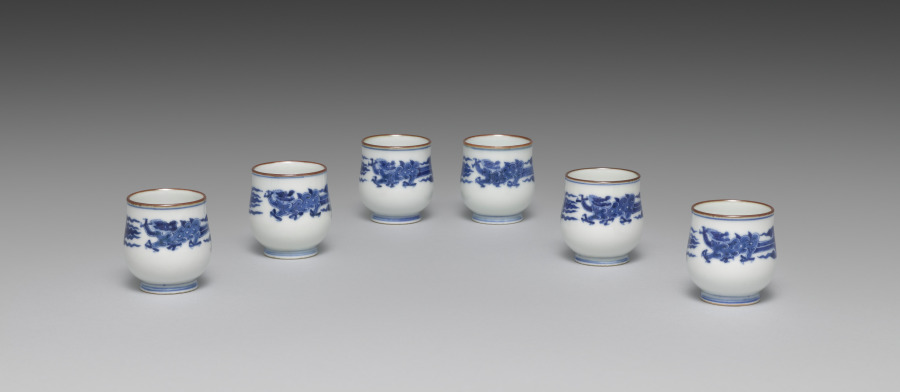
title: Sake Cups with Dragons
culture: Japan, Meiji period (1868–1912)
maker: Seifū Yohei III (Japanese, 1851–1914)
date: 1893–1914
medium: Set of six sake cups; porcelain with underglaze blue and iron oxide rims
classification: Ceramic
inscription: 大日本清風造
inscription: 清風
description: Each of these sake cups pictures two backward-looking dragons. The highly stylized creatures resemble jade carvings.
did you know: Seifū Yohei III was inspired by the Chinese mythical animals that were common on porcelain objects made at Jingdezhen in China during the Ming dynasty (1368–1644) and then exported around the world.